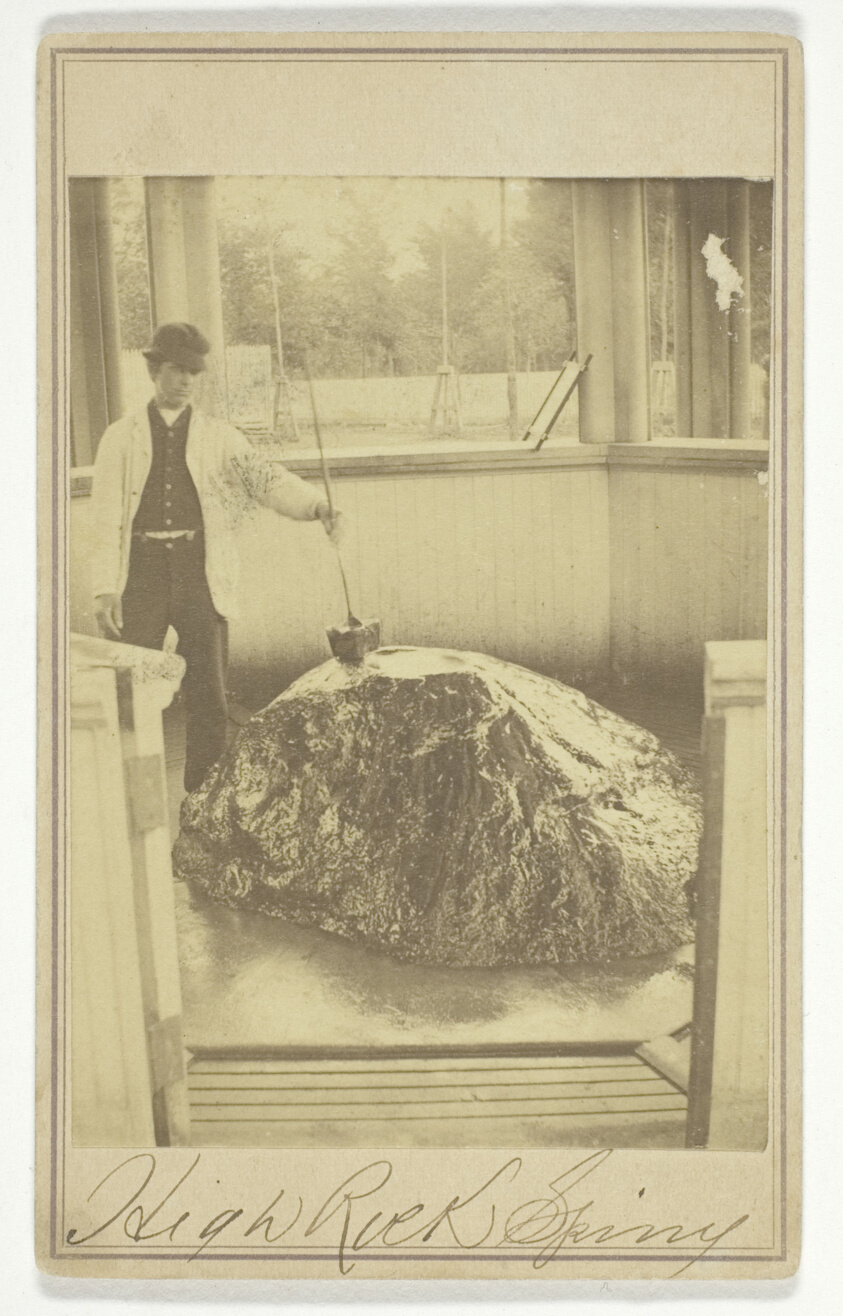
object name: Photograph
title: High Rock Spring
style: 19th century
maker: Deloss Barnum (American, active 1850–1870)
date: c. 1865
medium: Albumen print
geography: Saratoga Springs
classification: photographic process; photography; card photographs; photograph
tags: Collected by Hugh Edwards